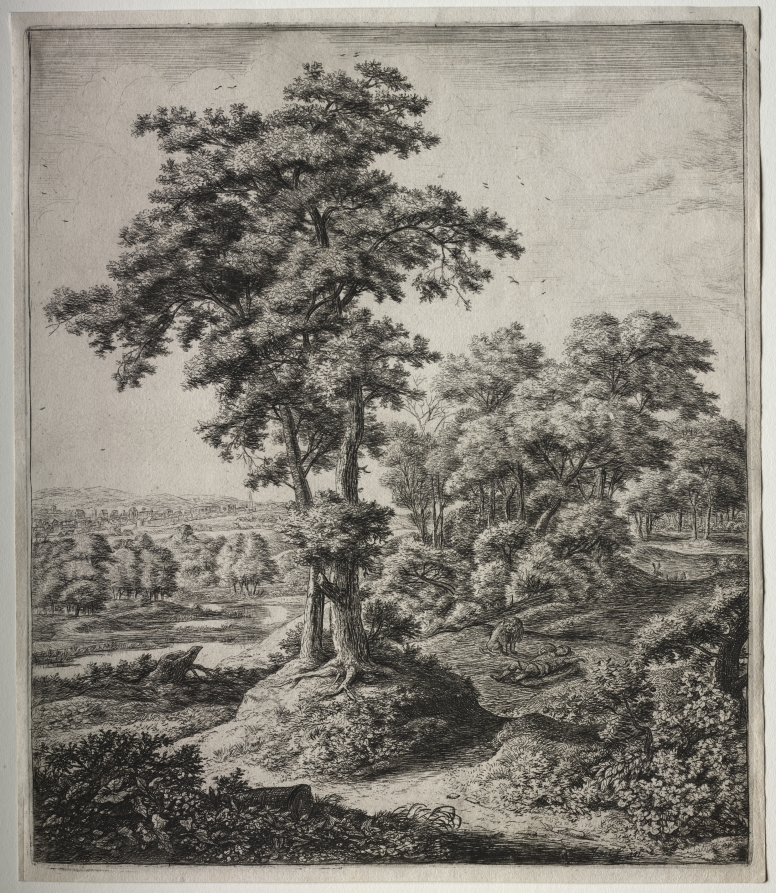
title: Six large upright landscapes with scenes from the Old Testament: The Unfaithful Prophet of Judah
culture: Netherlands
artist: Anthonie Waterloo (Dutch, 1609/10–1690)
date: 1640–90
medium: etching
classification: Print